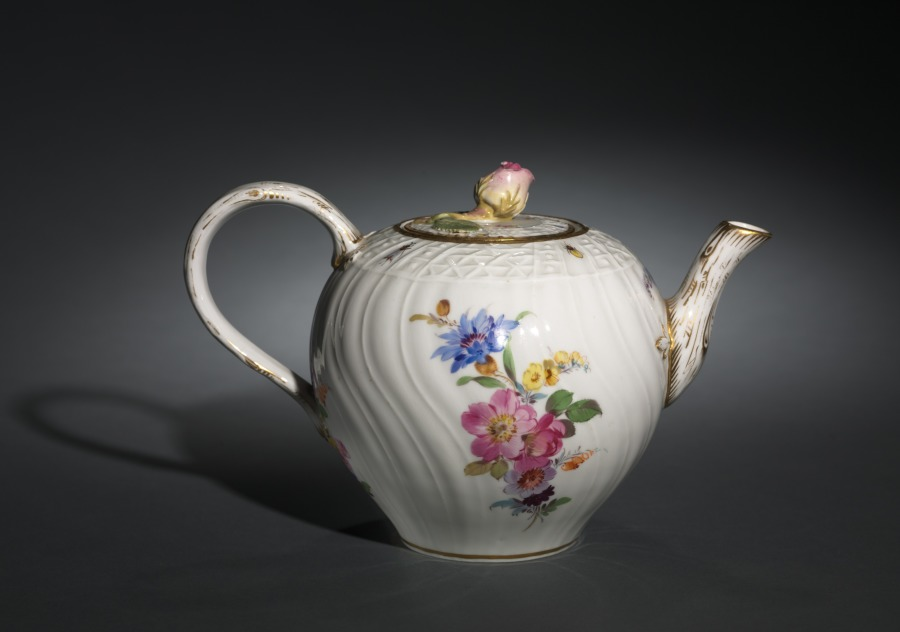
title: Teapot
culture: Germany, Meissen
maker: Meissen Porcelain Factory (German, est. c. 1710)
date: c. 1750–70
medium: porcelain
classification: Ceramic